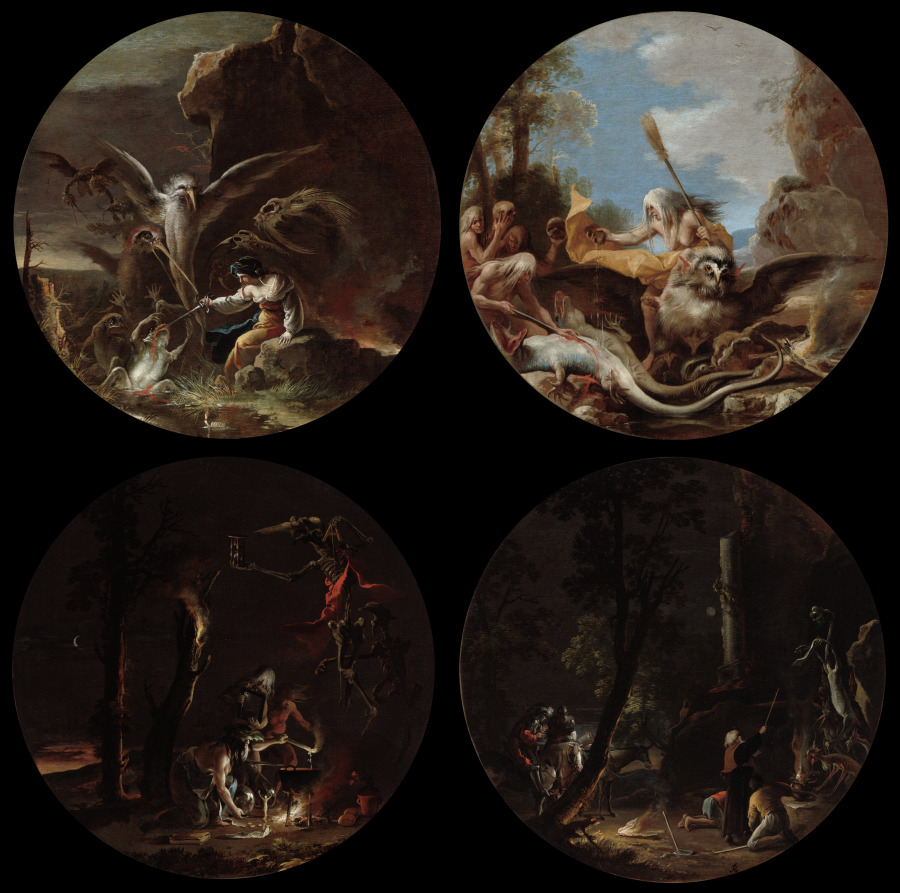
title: Scenes of Witchcraft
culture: Italy, 17th century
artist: Salvator Rosa (Italian, 1615–1673)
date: c. 1645–1649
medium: oil on canvas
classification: Painting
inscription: Signed: "SR [monogram]"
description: A huge upturn in interest in witchcraft emerged during the 1500s in Europe, but by the middle of the next century—at least among the cultured elite of Florence—a backlash arose against the many accusations of sorcery. Artists and writers explored the topic more out of curiosity and amusement, chief among them the poet, painter, and satirist Salvator Rosa, who examined witchcraft with gusto in numerous poems and works of art, including these four paintings. They show a range witch types, from the beautiful enchantress to the old crone to the male sorcerer, and represent activities commonly associated with black magic: levitation, love potions, devil worship, the invocation of demons, and transformation. A common subject in Italian art of the 1600s, transformation was usually seen in interpretations of myths based on Ovid's ancient Latin text, the Metamophoses. Rosa found a novel way to exploit this idea, drawing attention to his own ability to transform paint and canvas into a disturbing, nightmarish world.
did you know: The artist chose the painting's shape to reference the foundational role of the circle in practicing magic.